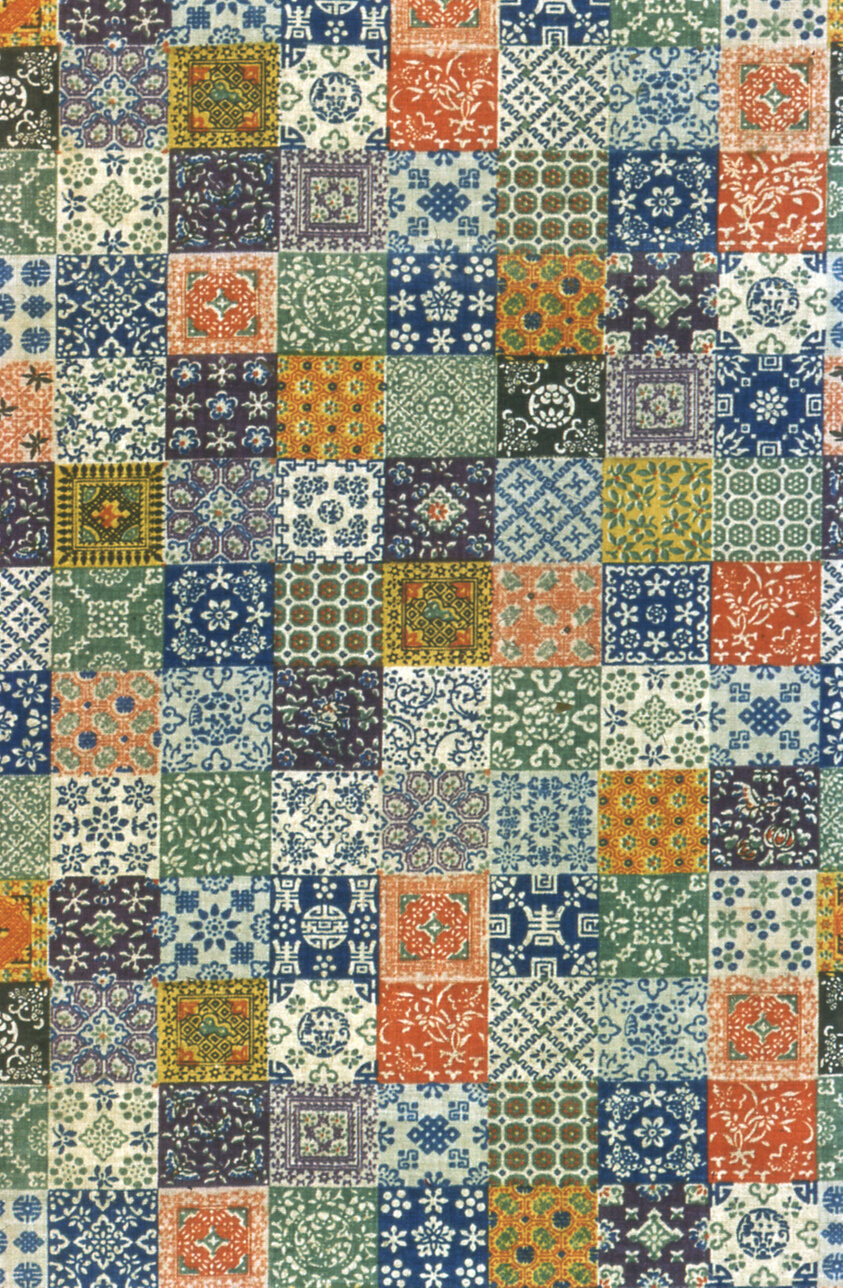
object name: Textile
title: Panel (Furnishing Fabric)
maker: Europe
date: 19th century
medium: Cotton, plain weave; block printed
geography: Europe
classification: textile; weaving - printed; furnishing textile